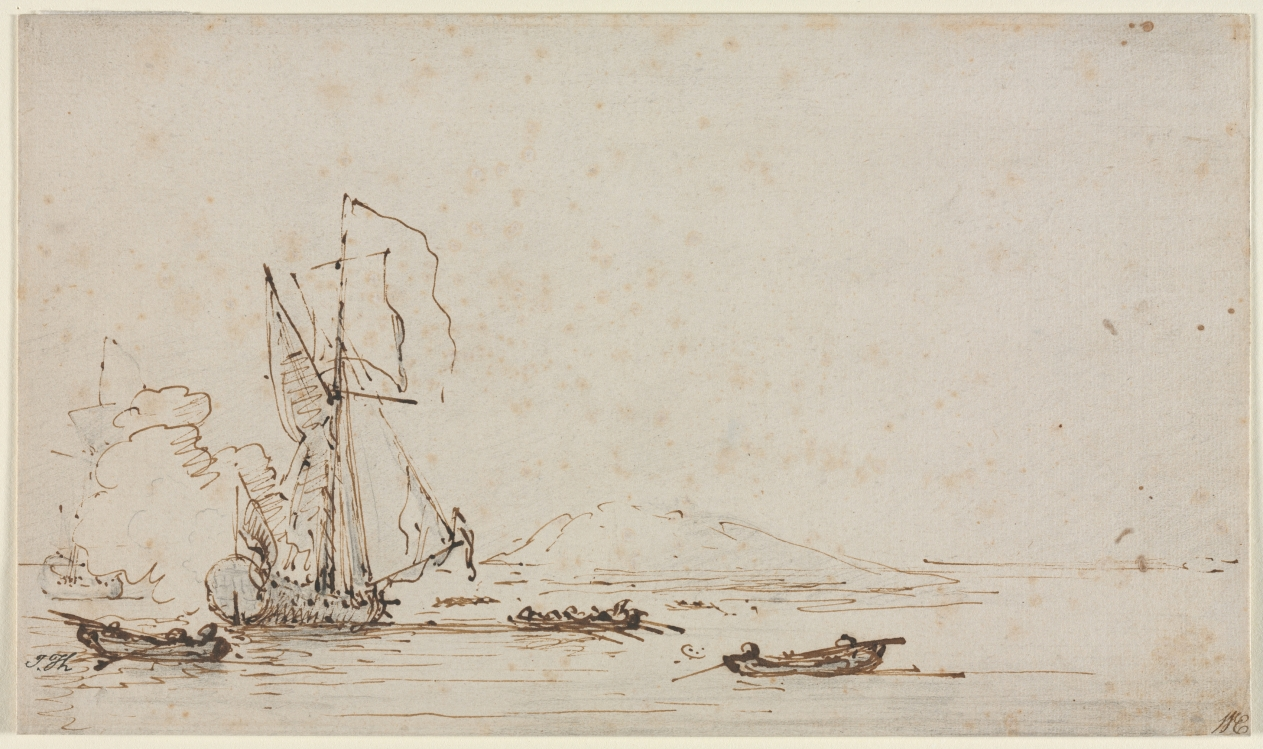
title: Yacht Receiving Salute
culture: Netherland, early 18th Century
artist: Willem van de Velde (Dutch, c. 1611–1693)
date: c. 1700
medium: pen and brown ink over graphite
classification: Drawing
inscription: VERSO OF SECONDARY SUPPORT, lower left, in brown ink: J. Thane sale 1819 W.E.[in ligature] P. 95 N 148 ; lower left, in graphite: J. Thane + W. Esdale Collections ; upper left, in graphite: 34 [circled, erased] ; upper left, in graphite: 19 [erased] / P [erased] ; upper right, in graphite: 4 [?] ; lower center, in graphite: [illegible, erased] ; lower right, in graphite: [illegible, erased]